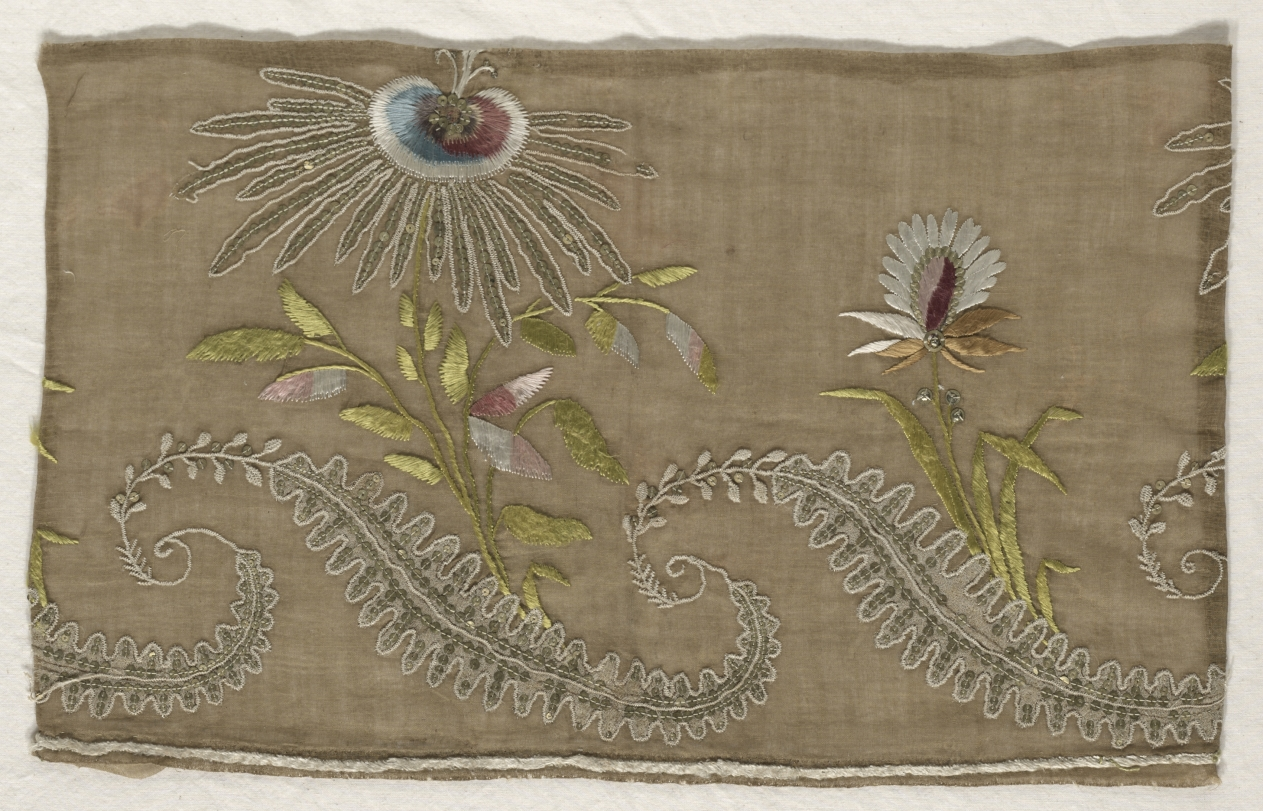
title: Fragment of Embroidery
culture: Spain, Southern, 18th century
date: 18th century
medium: embroidery, silk threads on silk ground, linen appliqué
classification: Embroidery